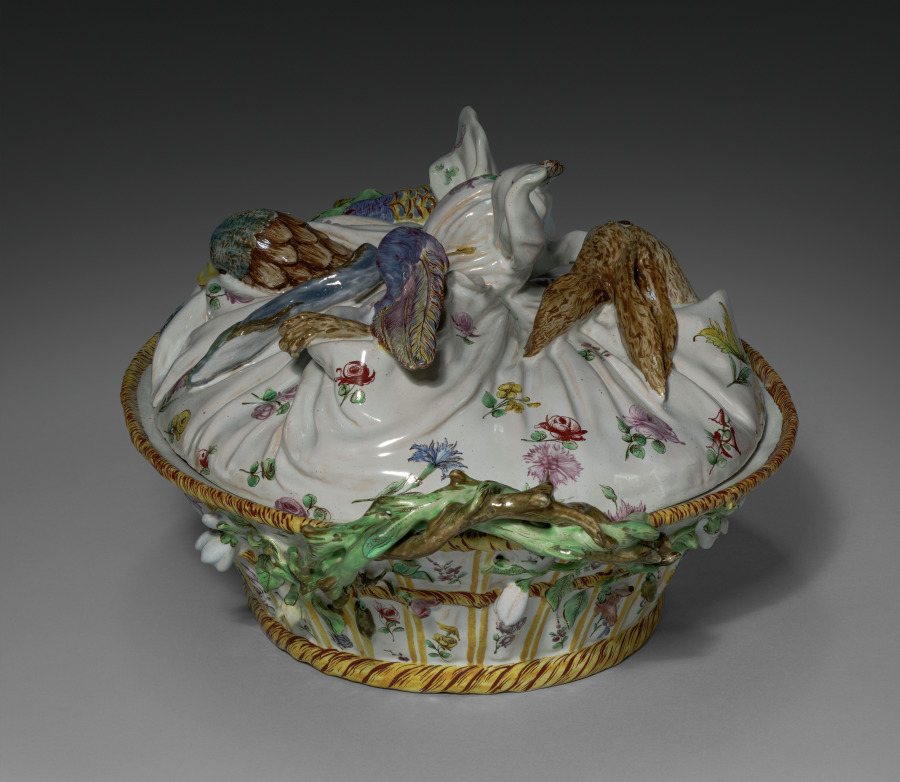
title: Covered Tureen in the Form of a Basket of Game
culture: France, 18th century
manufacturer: Sceaux Factory (French, active 1748–66)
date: c. 1755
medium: Tin- glazed earthenware (faience) wth enamel decoration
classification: Ceramic